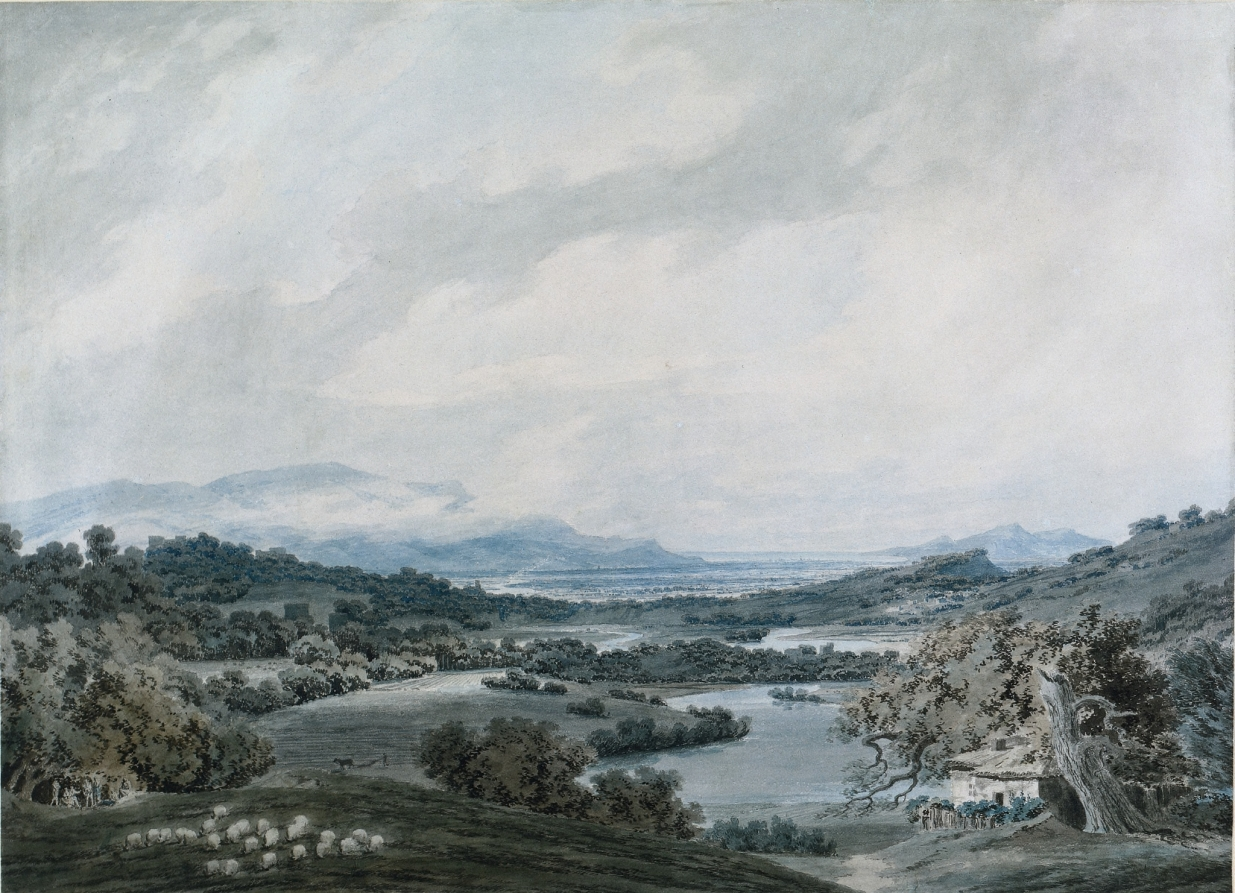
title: Italian Landscape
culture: England, London, 18th century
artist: John Robert Cozens (British, 1752–1797)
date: c. 1790–92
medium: watercolor over graphite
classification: Drawing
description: During the 18th century, views of Italy and the Continent were in great demand among British aristocrats on the Grand Tour. Cozens journeyed to Italy and Switzerland twice in his career, making pencil and wash sketches from which he later derived highly finished watercolors for various patrons. The artist’s somber palette, limited to muted greens, grays, and blues, produces a melancholy, hazy effect in this landscape. The site depicted here has thus far proved unidentifiable and may be an amalgamation of memory and imagination. The left portion of the composition relates to another watercolor depicting a view of Velletri, a town outside of Rome; the cottage and trees in the right foreground seem English, and the central plain and winding river appear to be pure invention.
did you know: John Robert Cozens's watercolors became widely known after the doctor who treated him during a mental breakdown in 1794 enlisted two other artists to produce copies for circulation.